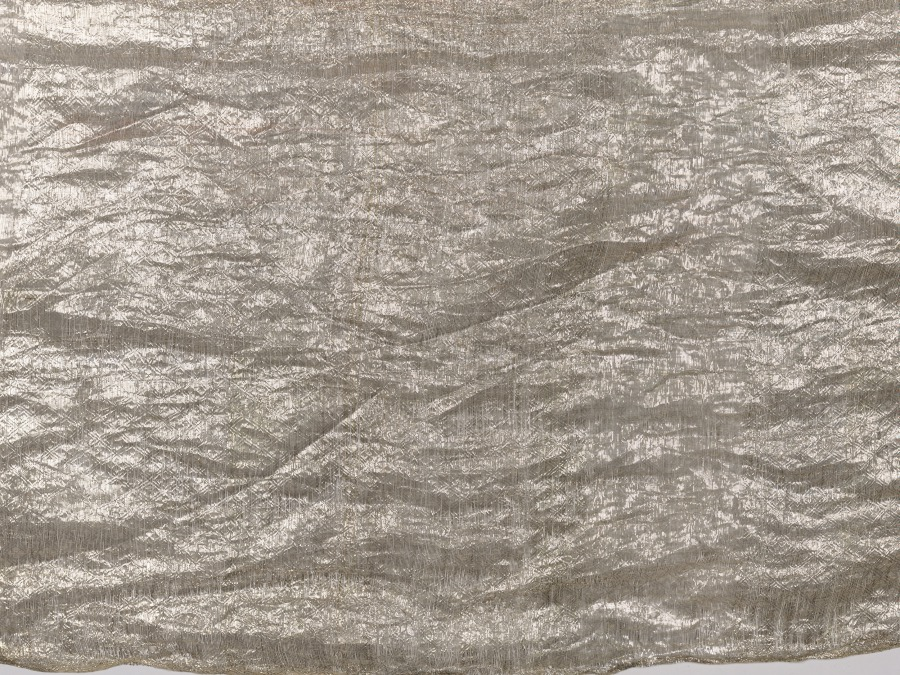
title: Length of Cotton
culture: India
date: early 1900s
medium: cotton, metallic thread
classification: Textile